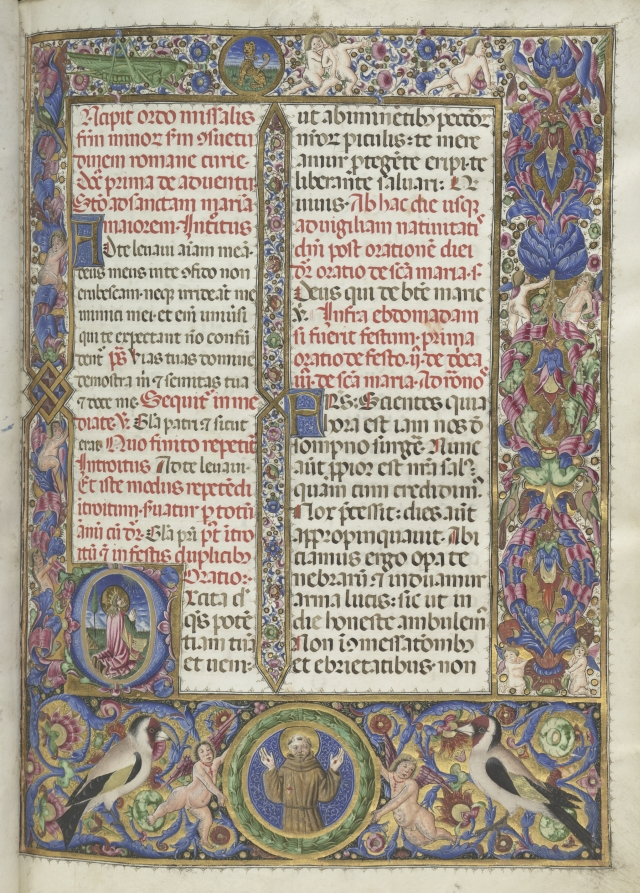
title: Missale: Fol. 9: Ordo Missalis (full borders)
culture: Italy, Perugia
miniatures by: Bartolommeo Caporali (Italian, c. 1420–1503)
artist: assisted by Giapeco Caporali (Italian, d. 1478)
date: 1469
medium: ink, tempera and burnished gold on vellum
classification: Bound Volume